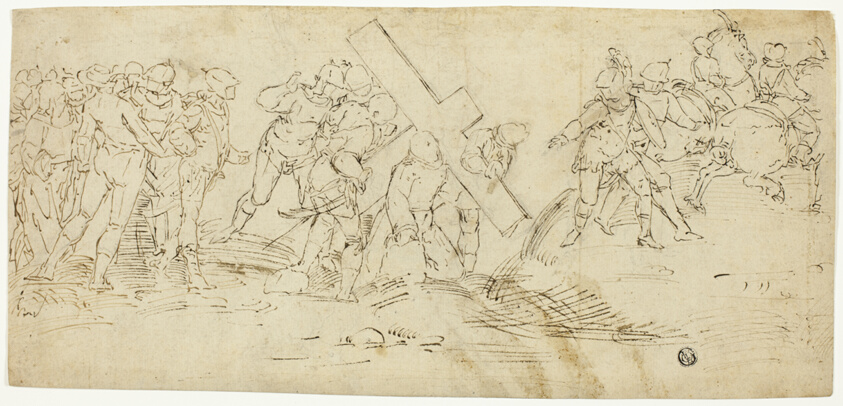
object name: Drawing and Watercolor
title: Via Crucis; Christ Falling Beneath the Cross (recto) Sketch of Male Nude (verso)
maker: Follower of Luca Cambiaso (Italian, 1527-1585)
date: 1560/70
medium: Pen and brown ink over traces of black chalk, on ivory laid paper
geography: Italy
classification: drawings (visual works); prints and drawing